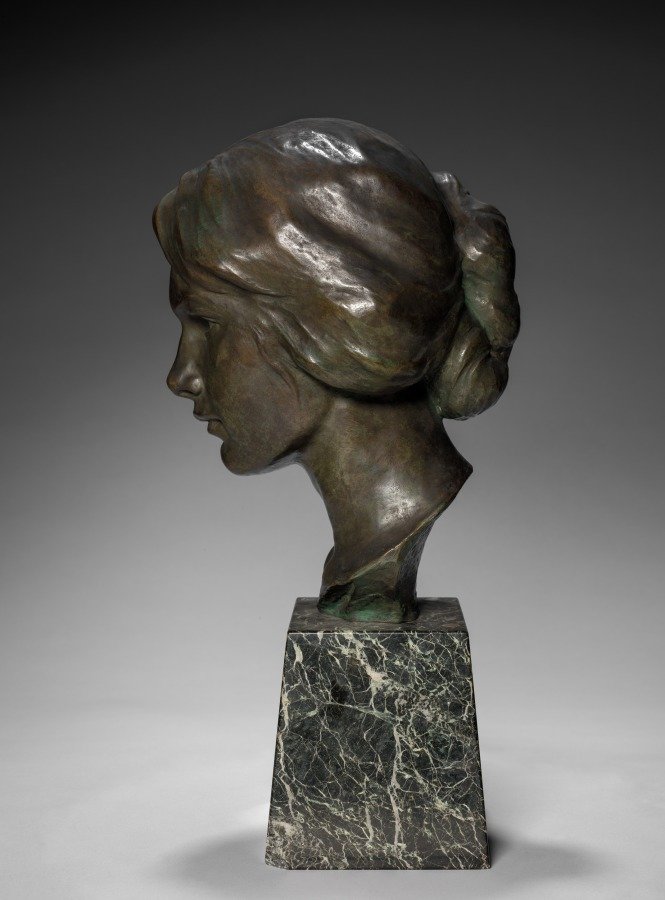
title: Head of a Girl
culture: America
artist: Nancy Coonsman (American, 1888–1920)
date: c. 1920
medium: bronze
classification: Sculpture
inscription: signed back of neck: Nancy Coonsman © R.C. & N.M. Vose/Roman Bronze Works New York.